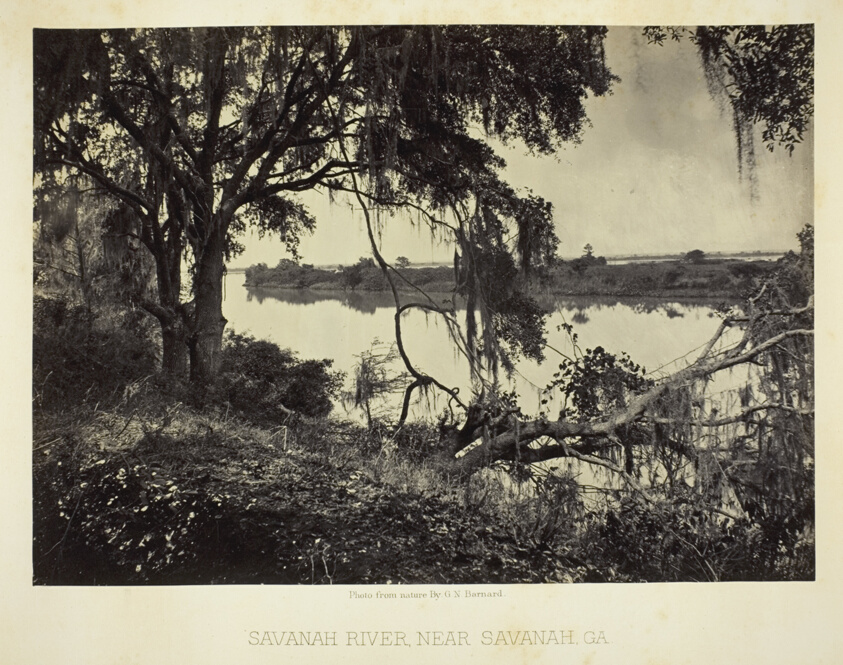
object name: Photograph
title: Savannah River, near Savannah, GA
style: 19th century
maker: George N. Barnard (American, 1819–1902)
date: 1866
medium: Albumen print, plate 47 from the album "Photographic Views of the Sherman Campaign" (1866)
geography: United States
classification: albumen silver print; photographic process; photography; photograph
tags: Collected by Hugh Edwards, Sherman's Campaign 1866